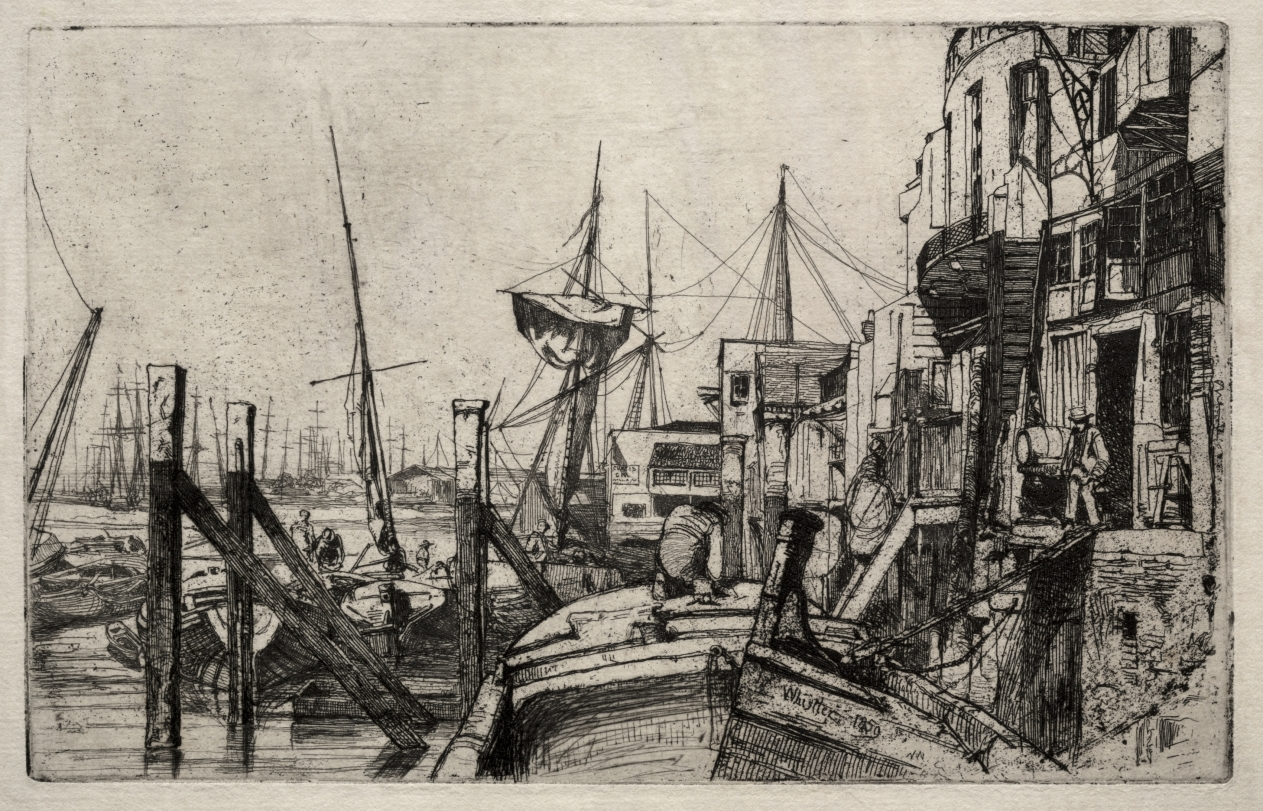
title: Limehouse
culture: America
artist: James McNeill Whistler (American, 1834–1903)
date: 1859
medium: etching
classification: Print